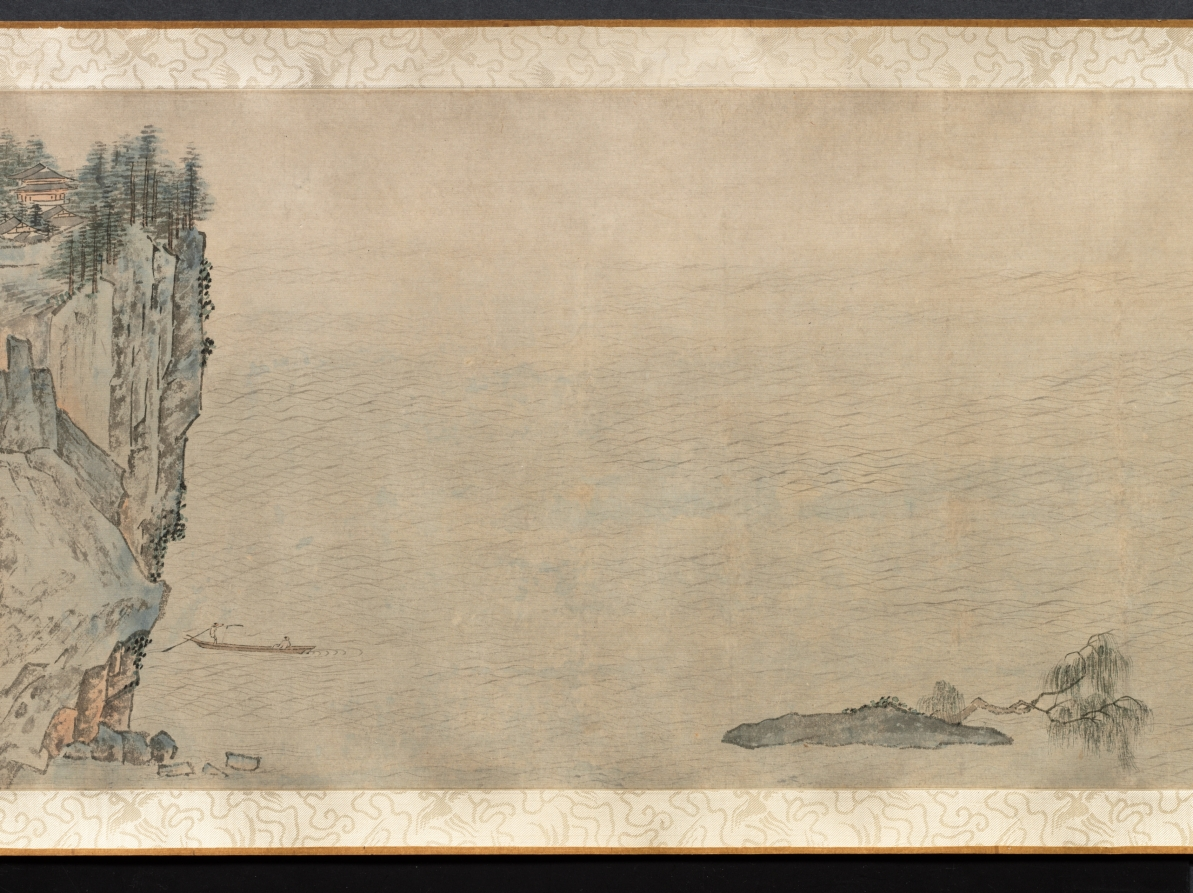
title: Ten Thousand Li of the Yangzi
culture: China, Ming dynasty (1368–1644)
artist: Dai Jin (Chinese, 1388–1462)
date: c. 1400s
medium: Handscroll; ink and color on paper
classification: Painting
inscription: Two colophons at end. Artist's seals: Dai Jin 戴進 and Wenjin 文進.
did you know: Dai Jin is traditionally considered the founder of the Zhe School, a style of landscape painting.